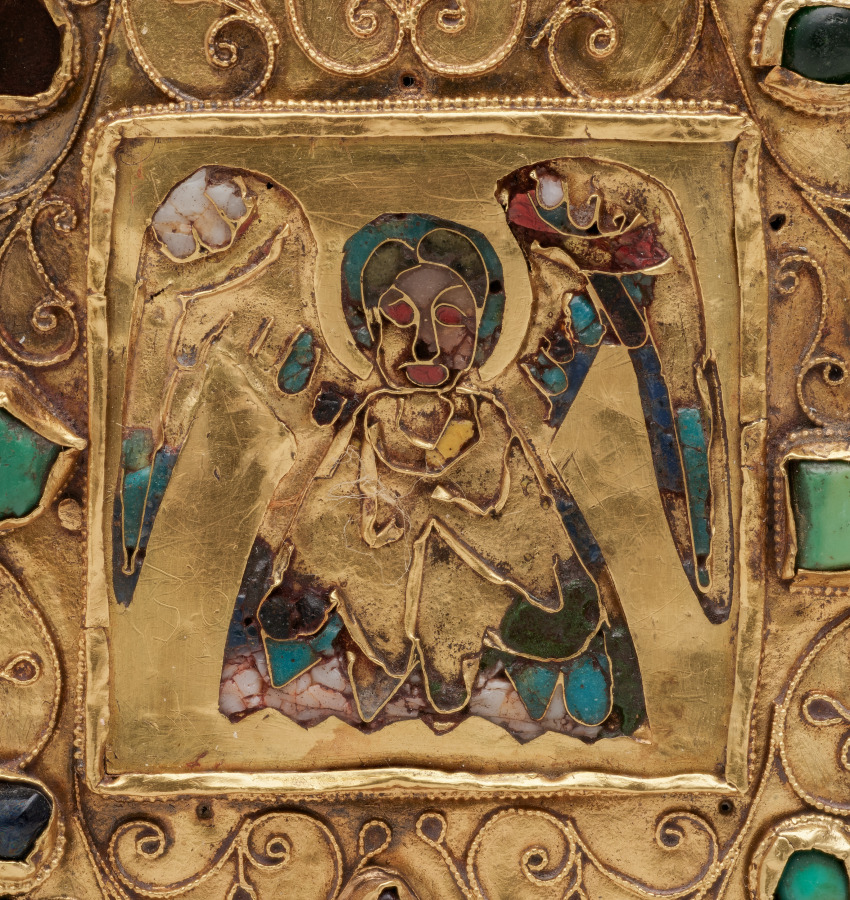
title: Ceremonial Cross of Countess Gertrude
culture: Germany, Lower Saxony?, 11th century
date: 1038 or shortly after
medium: gold: worked in repoussé; cloisonné enamel, intaglio gems, pearls, wood core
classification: Metalwork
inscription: translation of inscription on back: For the Relics of the Holy Apostle Peter and the Holy Virgin Liutrudis, Countess Gertrude Ordered this made.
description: This precious gold cross was commissioned by Countess Gertrude (died 1077) and given to the church of Saint Blaise following the death of her husband, Count Liudolf of Brunswick (died 1038). The cross was intended to be carried in liturgical processions or to be placed on a church altar. The inclusion of relics within the crosses endowed them with an additional role as devotional objects. At the center of the four cross arms, fine but much damaged cloisonné enamel plaques represent the symbols of the four Evangelists--an eagle for Saint John (above); a lion for Saint Mark (on the left); an ox for Saint Luke (on the right); and an angel for Saint Matthew (below). Pearls and precious and semiprecious stones are set within an intricate network of gold filigree while a large sapphire, inscribed in a circle and likewise surrounded by pearls and precious stones, is placed at the crossing.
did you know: Countess Gertrude's name appears on the back of the cross at the bottom.